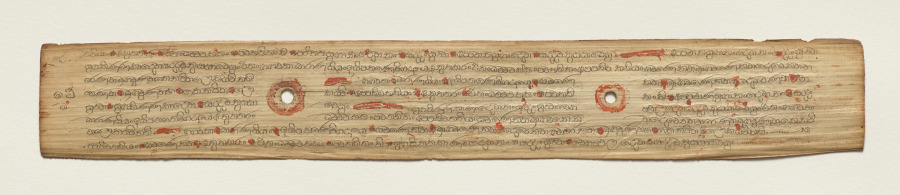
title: Leaf from a Buddhist Manuscript (recto)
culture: Sri Lanka, Singhalese, Late 17th century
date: c. 1700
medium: fiber paper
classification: Manuscript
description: Palm leaf material is still used for manuscripts in Sri Lanka. The palm leaves are prepared first by boiling them, drying them in the sun, and then rubbing them with oils. Scribes then use a metal stylus to incise the text. Then charcoal powder is wiped across the pages, filling in only the inscribed lines.